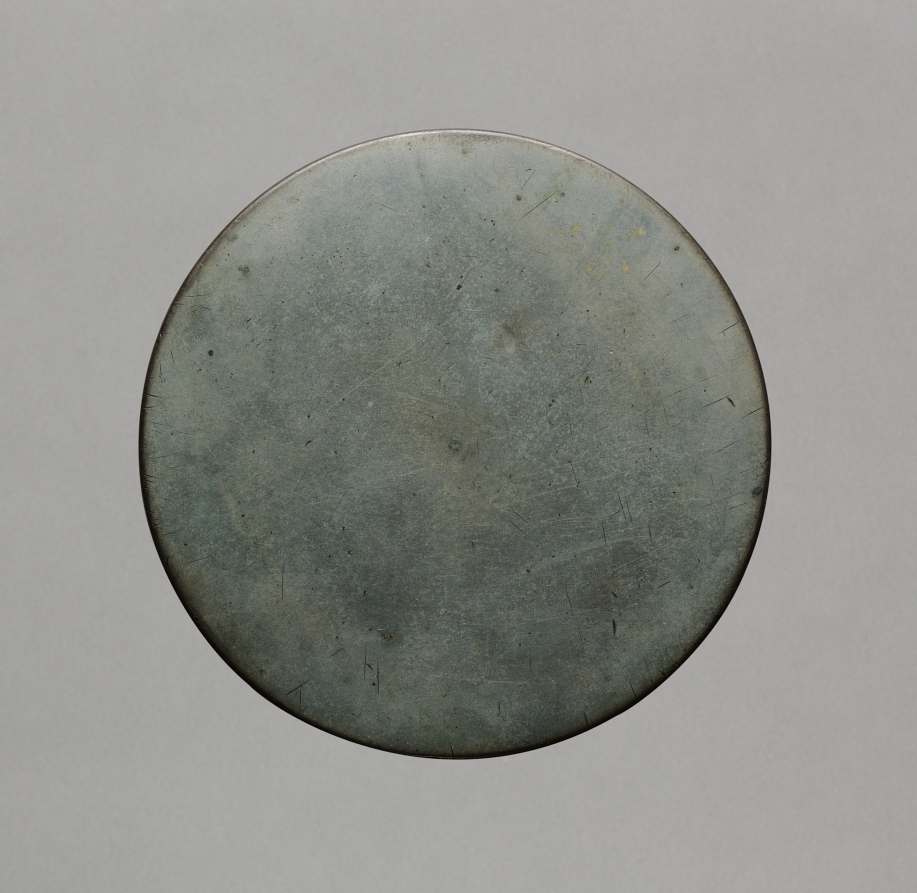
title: Mirror with Pair of Birds and Chrysanthemum Pattern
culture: Japan, Muromachi period (1392–1573)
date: 1392–1573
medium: bronze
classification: Metalwork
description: The Japanese used chrysanthemums as decorative elements on mirrors. In the Heian period, a chrysanthemum with cranes or long-tailed birds was a common motif. Later, in the Kamakura and Muromachi periods, chrysanthemum designs were divided into three patterns with different symbolic associations: Chrysanthemum with Cranes represented longevity; Water Flowing suggested longevity as well as the Noh drama Kikujido, or Chrysanthemum Boy; and East Fence alluded to the poem "Drinking Wine" by Tao Yuanming (AD 365-427). Here, the mirror featuring Buddhist iconography (kyojo) and a chrysanthemum design on the back shows that the flower was also appreciated in the context of Buddhism in the Kamakura period.